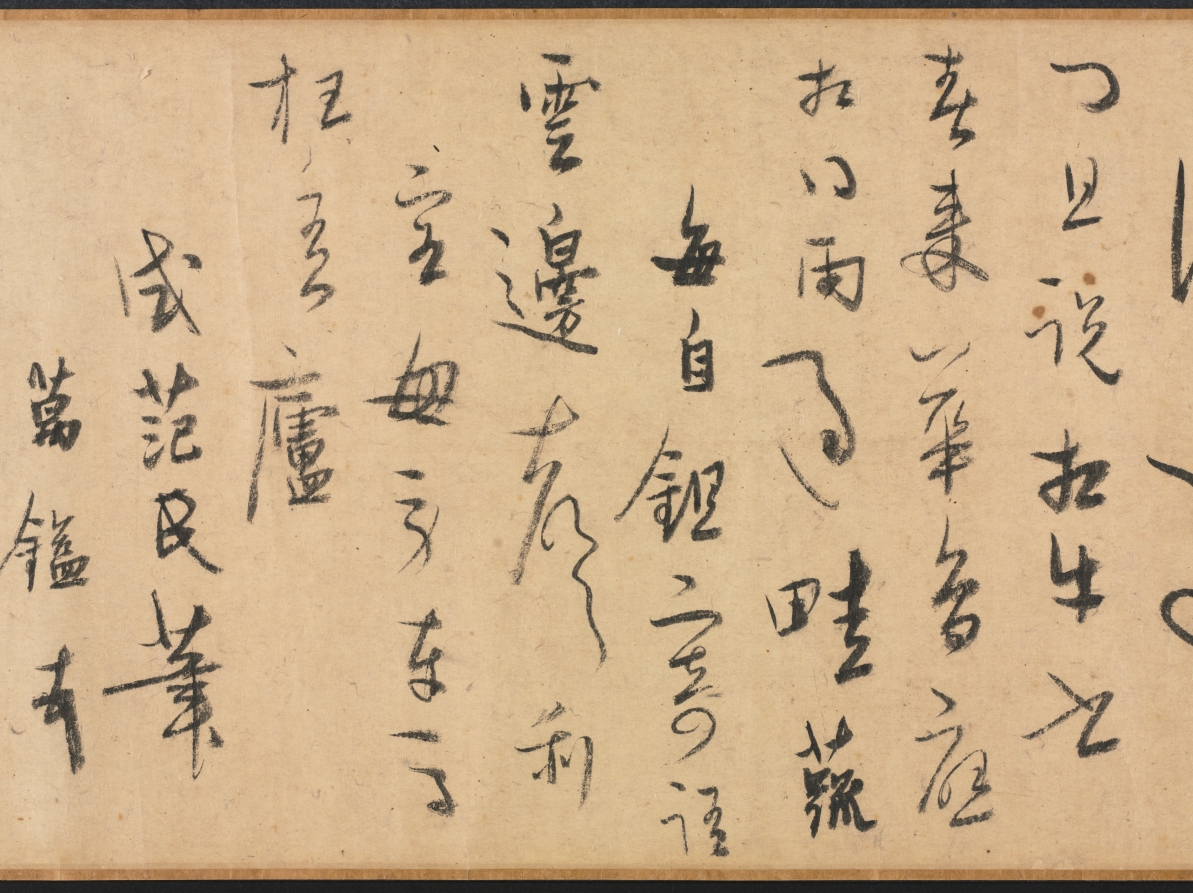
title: Leisure Enough to Spare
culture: China, Yuan dynasty (1271-1368)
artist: Yao Tingmei (Chinese, active mid-1300s)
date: 1360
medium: handscroll, ink on paper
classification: Painting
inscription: 至正廿年春正月_日作此併系鄙語于尾 地偏人遠閉柴關，滿院松陰白晝閒。 眼底風塵渾忘却，坐看流水臥看山。 吳興姚廷美畫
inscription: 23 colophons and 53 seals (dates unavailable for some): 1 colophon, dated 1360, and 2 seals of Yang Weizhen (1296-1370); 1 colophon and 3 seals of Wan Yi; 1 colophon of Zhang Junde; 1 colophon and 3 seals of Angji (act. ca. mid-14th c.); 1 colophon and 1 seal of Xu Shiquan; 1 colophon and 3 seals of Gao Yu; 1 colophon and 2 seals of Li Mingfu; 1 colophon and 2 seals of Lu Lin; 1 colophon and 1 seal of Zhang Qian; 1 colophon of Tao Tangwen; 1 colophon and 1 seal of Wu Yuangui (act. ca. 1300-60); 1 colophon of Bao Jiong; 1 colophon of Wang Zao; 1 colophon and 1 seal of Ma Chuyi; 1 colophon and 1 seal of Lin Yizhuang; 1 colophon and 1 seal of Gu Shunju; 1 colophon and 2 seals of Wang Jing; 1 colophon and 2 seals of Lin Shouchang; 1 colophon and 1 seal of Gao Zhidao; 1 colophon of Lin Xun; 1 colophon, dated 1359, and 2 seals of Meng Weicheng (act. mid-14th c.); 1 colophon and 1 seal of Meng Zhiji (act. mid-l4th c.); 14 seals of Liang Qingbiao 梁清標 (1620-1691); 1 poem dated 1755 and 5 seals of the Qianlong 乾隆 emperor (r. 1736-95); 2 seals of the Jiaqing 嘉慶 emperor (r. 1796-1821); 3 seals of the Xuantong 宣統 emperor (r. 1909-11).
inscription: Title on frontispiece by Zhang Bi 章弼: Signed Gongchen 拱辰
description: Seclusion and leisure—the ideals of the literati, or scholar-gentlemen—are expressed in this mature work by Yao Tingmei. The theme acquired special meaning at a time of the military uprisings near the end of the Yuan dynasty. Dedicated to an ascetic named Du, this work combines painting, calligraphy, and poetry; following the painting are more than 20 poems and essays written by notable scholars, one of whom was the calligrapher Yang Weizhen. It reveals not only the aesthetic taste of the literati but also the practice of contributing artistic and literary works to fulfill social obligations. Yao's painting demonstrates his individual style derived from various ancient masters (Guo Xi, Dong Yuan, and Juran). Yang Weizhen's calligraphy exhibits his bold, vigorous style and his intent to capture the spirit of antiquity in art.